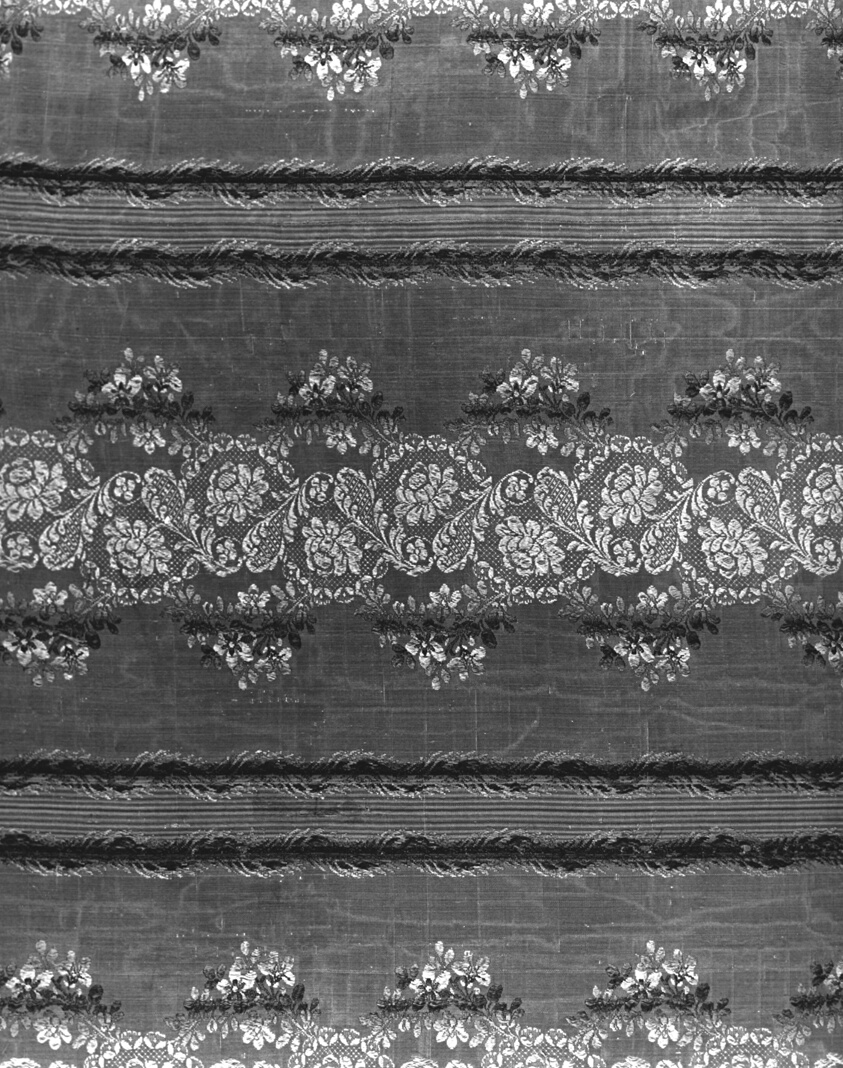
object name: Textile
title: Panel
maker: England or France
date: c. 1755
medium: Silk, warp-stripe plain weave with supplementary patterning warps tied by supplementary binding wefts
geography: England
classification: textile; weaving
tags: flowers, lace